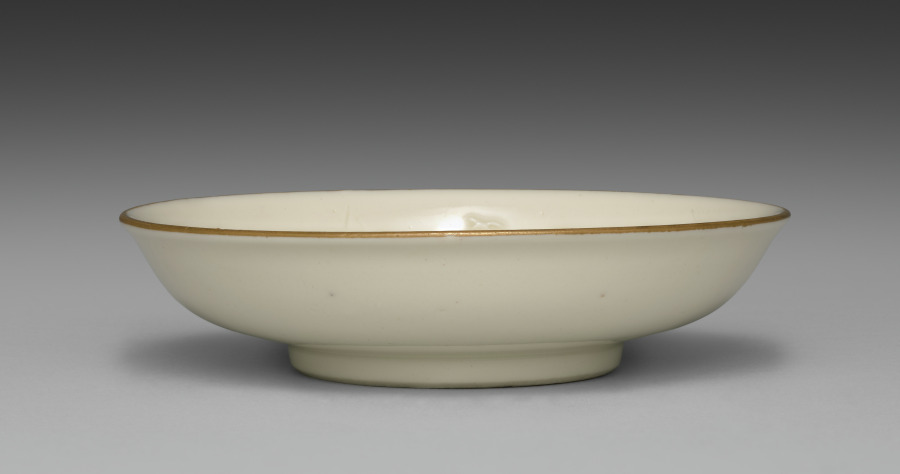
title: Small Dish from Dining Set with Plum Blossoms and Cracked-Ice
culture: Japan, Meiji period (1868–1912)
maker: Seifū Yohei II (Japanese, 1844–1878)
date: c. 1875–78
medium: Porcelain with molded designs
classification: Ceramic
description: Each item in this set has a delicate low-relief design of flowering plum branches over scattered, intersecting lines meant to resemble the cracked-ice surface of a frozen body of water and is signed on the base in gold pigment. While Yohei II produced many fine works in underglaze blue, like those produced by Kiyomizu Shichibei, he also made works in quite different styles later in his career, from the early 1870 s. In 1873, he was appointed purveyor to the Industrial Center of Kyoto Prefecture, a designation associated with Kyoto’s efforts to reach an international market through the port of Kobe; and from 1875 until his death, he was involved in national-level projects to present Japanese ceramics across the world. It was during this period that Yohei III was apprenticed to Yohei II, and it has been suggested that this set may in fact be an early example of Yohei III’s work, which he signed with his teacher’s name. Decorated with flowers resembling Japanese textile motifs, the set calls to mind the design of Yohei II’s pair of vases with plum blossoms in the Victoria and Albert Museum. Here, the elaborate trees created for a formal public exhibition setting have been translated into the approachable blossoms of the genteel domestic environment. While the designs are consistent across the pieces, each raised flower petal and pistil and each incised line in the ice was done by hand, so the cups, bowls, and dishes are similar yet unique. The bottoms of two boxes once identified the set’s owner, but the information has been deliberately obscured with black ink. However, inscriptions still visible appear to indicate two occasions, once at the end of July 1886 , and once again in June 1916 , when parts of the set were requested from Hokura in Niigata Prefecture. The location corresponds to a neighborhood in the present-day city of Jōetsu. The surname Tsuji 辻 also appears on a paper tag affixed to one of the box cloths. Future research may possibly reveal more about their provenance. A vase by Yohei III in a private collection combines the formal grandeur of the Yohei II vases in the Victoria and Albert Museum with the gentler design of this dining set, placing flowering plum trees against soft, scalloped-edge clouds resembling those in golden screens.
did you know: The dining wares have a creamy white coloration that the four boxes containing them identify as Korean in style.